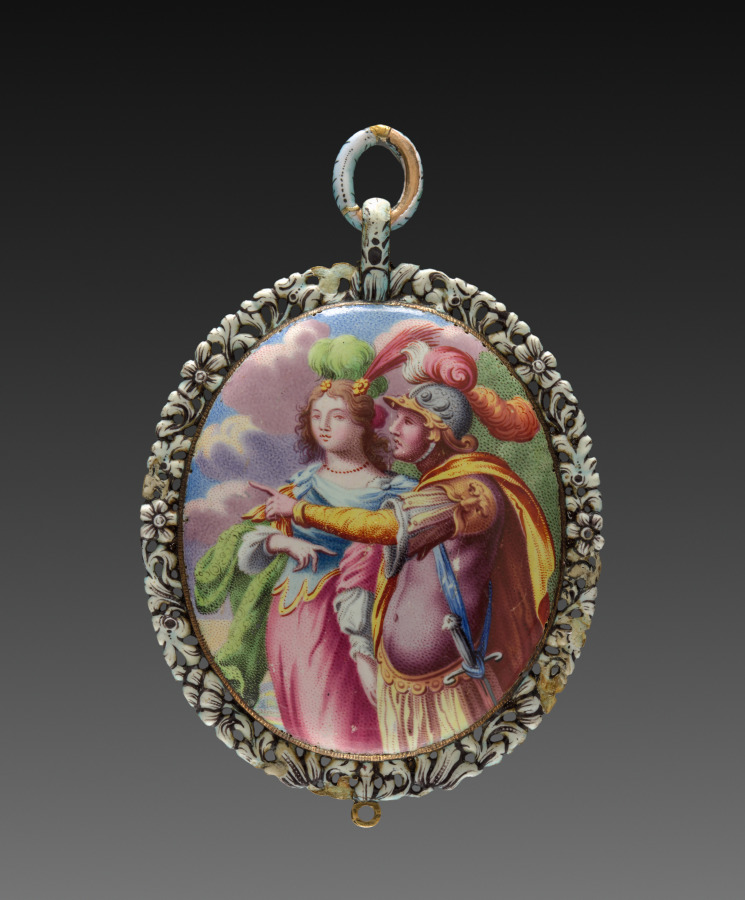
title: Locket Pendant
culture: Germany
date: 1600s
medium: enamel on gold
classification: Jewelry